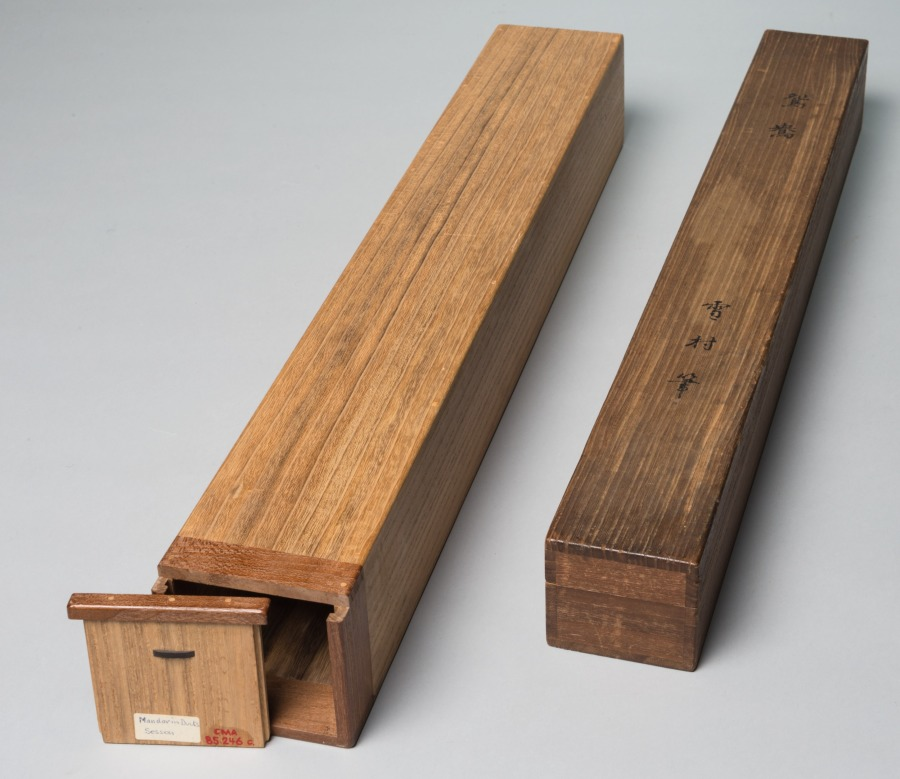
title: Mandarin Duck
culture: Japan, Muromachi period (1392–1573)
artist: Sesson Shūkei (Japanese, c. 1492–c. 1577)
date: 1500s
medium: hanging scroll; ink on paper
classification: Painting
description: In this painting, the artist depicted a scene of a solitary duck floating by reeds in a subtle arrangement of dry and wet, light and dark ink tones which conveys the tranquility of the moment.